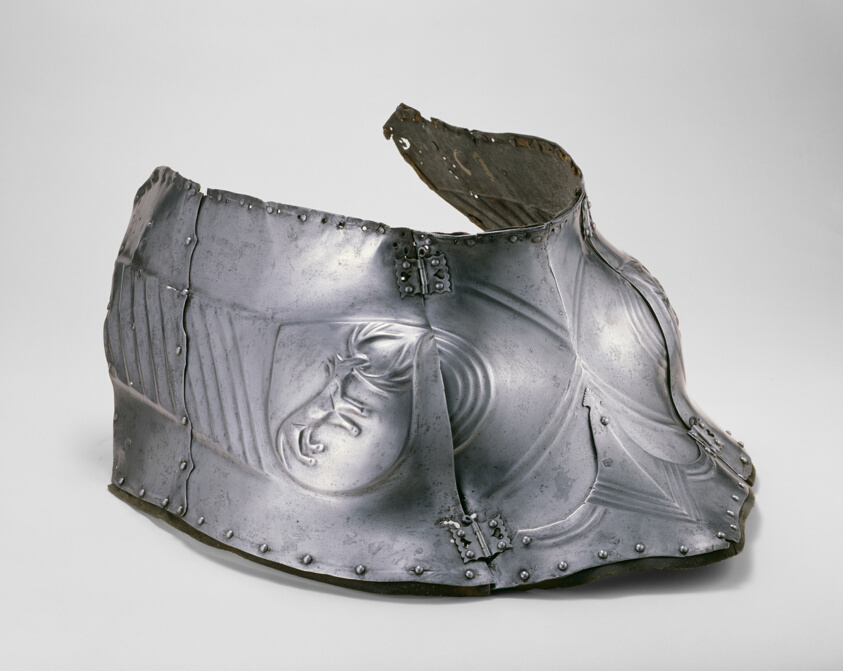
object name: Armor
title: Peytral from a horse armor of Georg von Wolframsdorf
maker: Christian Spor (Austrian, died 1485); Austrian, Mühlau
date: About 1480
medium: Steel and leather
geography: Mühlau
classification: horse equipment; armor; arms and armor